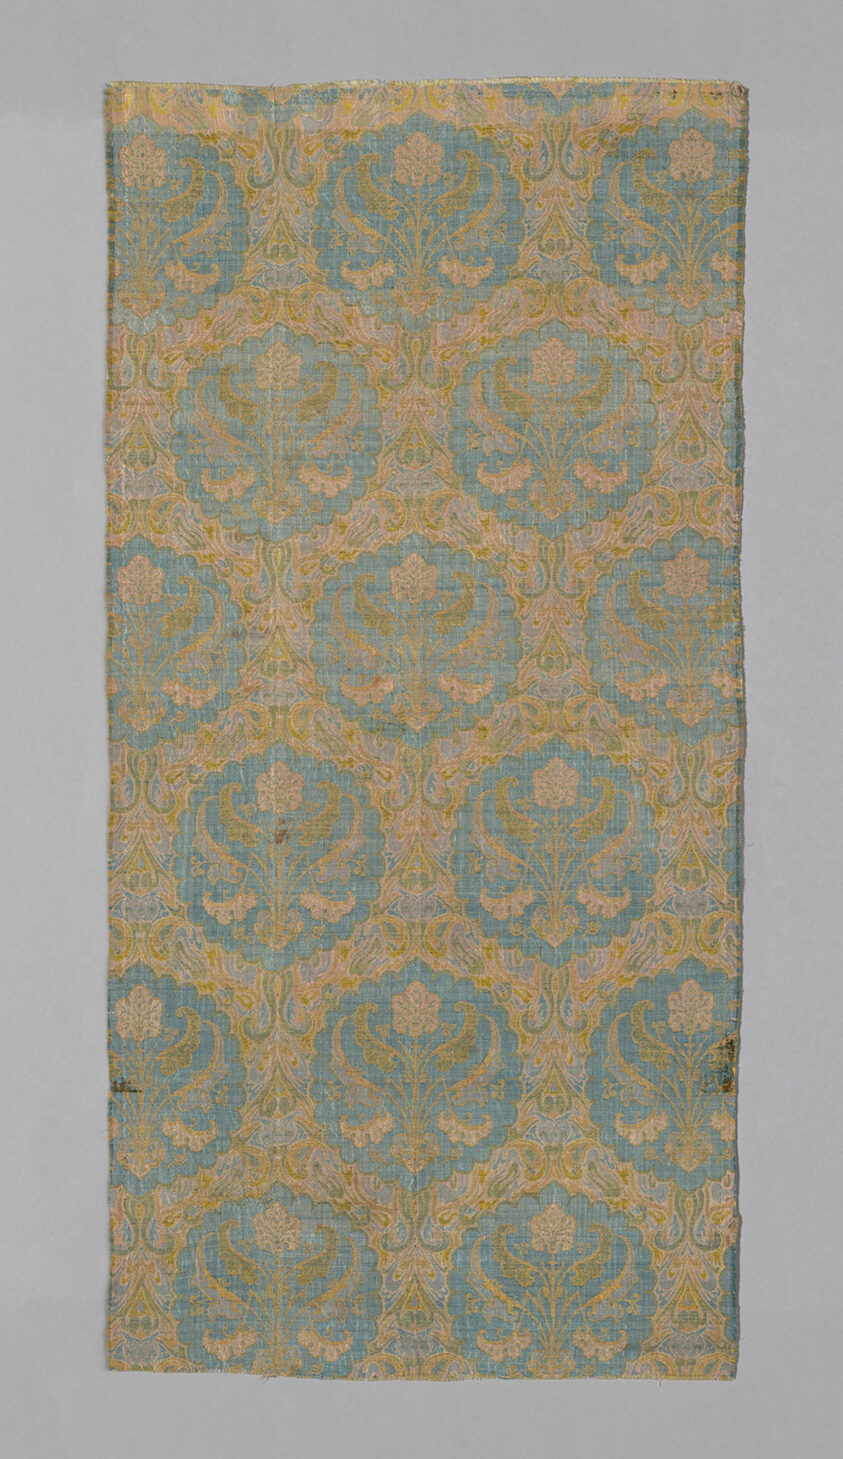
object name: Textile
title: Panel (Dress Fabric)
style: safavid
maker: Iran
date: 17th century, Safavid Dynasty (1501–1722)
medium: Silk, 2:1 twill weave, with complementary weft plain weave double cloth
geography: Iran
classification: textile; weaving